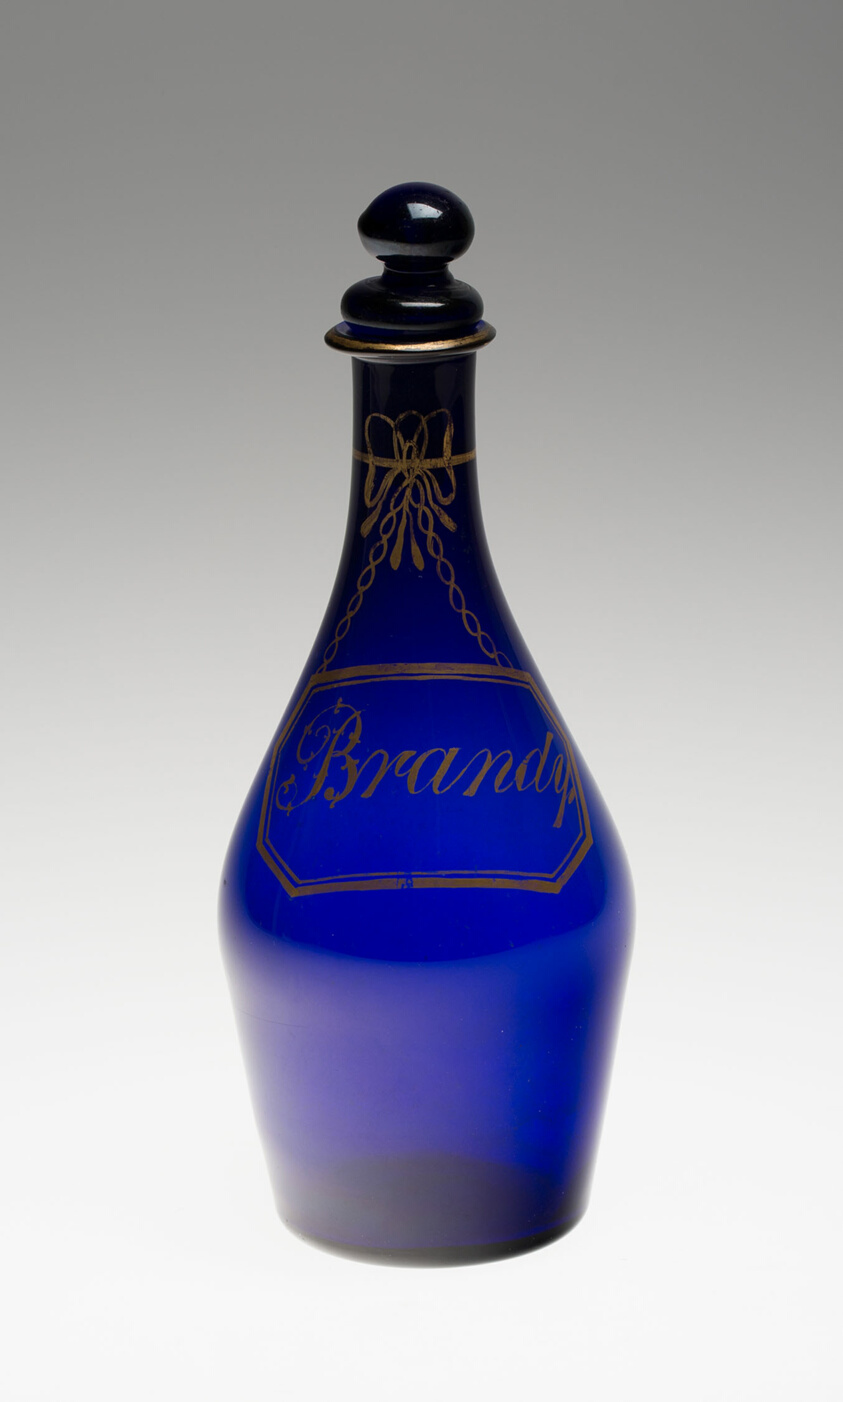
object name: Glass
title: Brandy Decanter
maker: England, Bristol; Gilding possibly by Isaac Jacobs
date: c. 1806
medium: Glass with gilding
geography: England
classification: glass